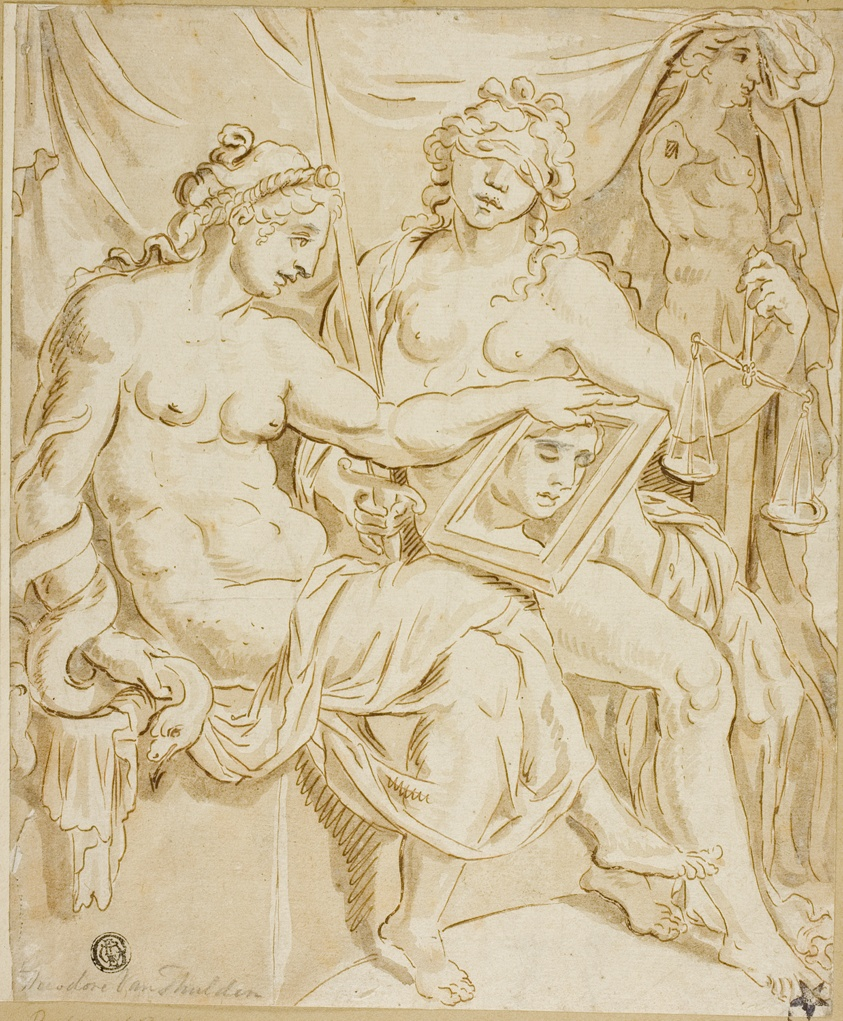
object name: Drawing and Watercolor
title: Prudence and Justice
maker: After Marten van Heemskerck (Netherlandish, 1498-1574); or Abraham Janssens (Flemish, c. 1574-1632); or Theodor van Thulden (Dutch, 1606-1669); or after Cornelis Bos (Netherlandish, 1506/10-c. 1564)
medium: Pen and brown ink, with brush and brown wash, with touches of graphite, on cream laid paper, tipped onto card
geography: Netherlands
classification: pen and ink drawings; drawings (visual works); prints and drawing